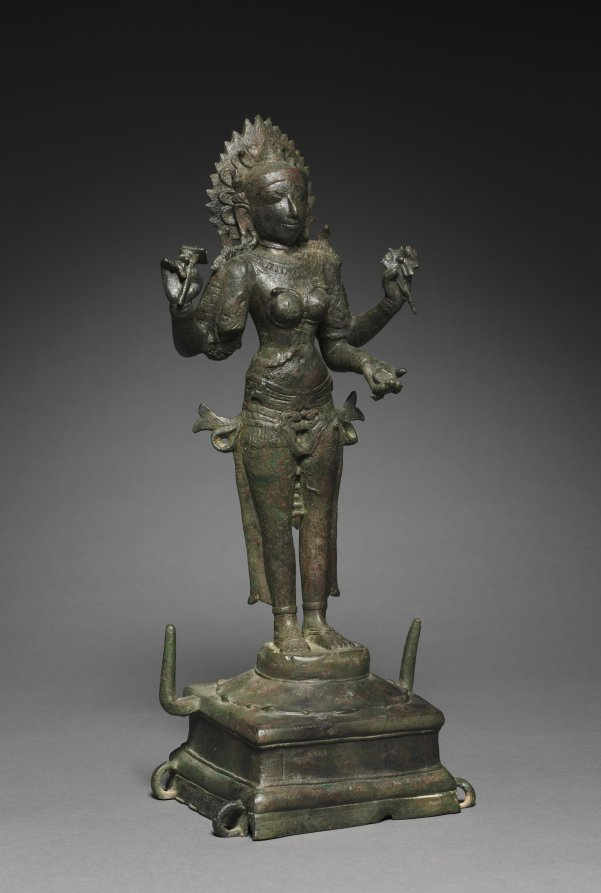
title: Kali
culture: South India, Tamil Nadu, Chola period (900-13th century)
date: 900s–1000s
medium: bronze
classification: Sculpture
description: The female aspect of Shiva, the goddess Parvati, has her own cycle of myths, and she herself emanates into different forms. Some branches of Hinduism consider the goddess to be the supreme creator divinity herself, who generated all the other gods, including Shiva. This bronze sculpture could have been affiliated with either branch. Kali is the wrathful form of the goddess generated in the midst of a battle with a demon that the gods failed to conquer. Kali was to drink his blood before any drop fell to ground, or else a new demon would instantly be generated. The demons are metaphors for human vices, such as egotistic pride and arrogance.